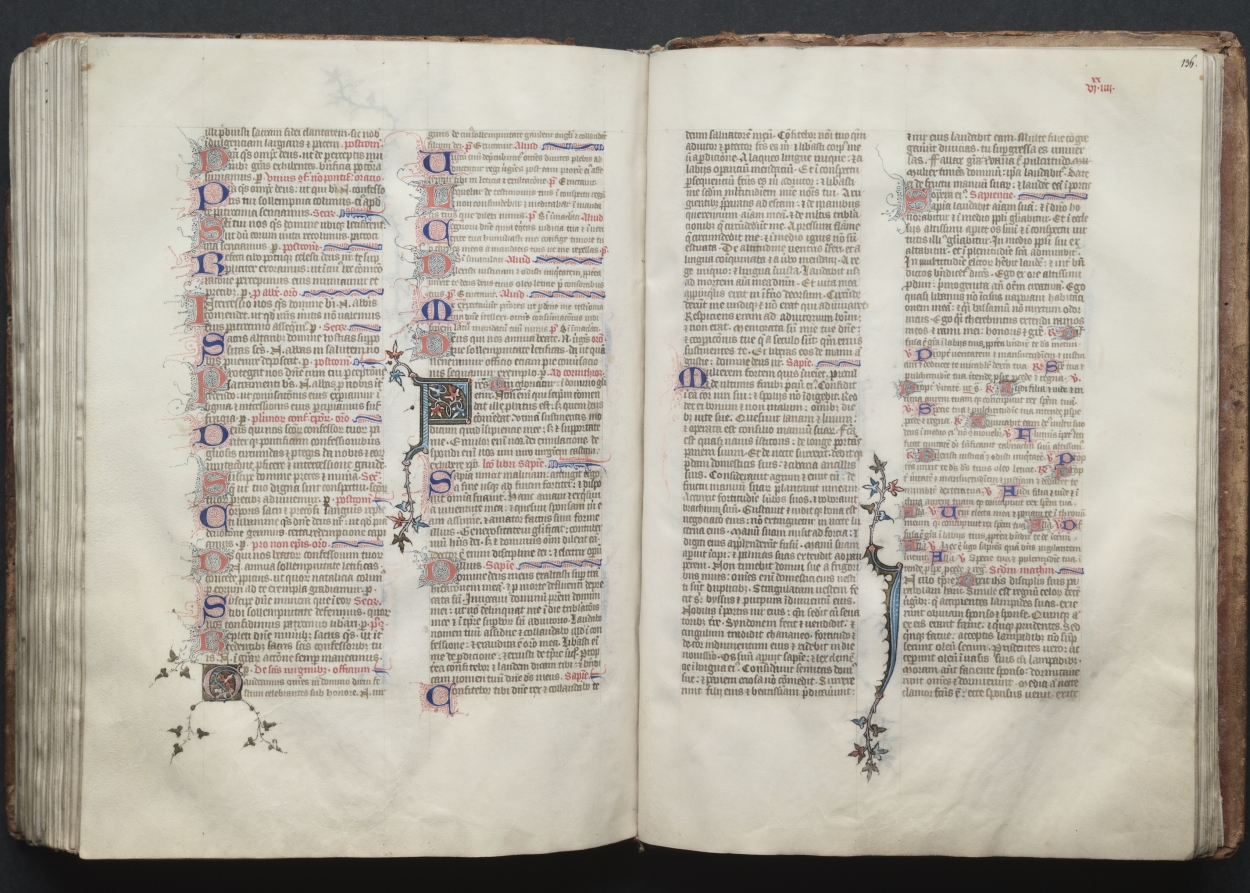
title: The Gotha Missal: Fol. 136r, Text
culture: France, Paris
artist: Master of the Boqueteaux (French)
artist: and Workshop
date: c. 1375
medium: ink, tempera, and gold on vellum; blind-tooled leather binding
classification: Bound Volume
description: The style and quality of this manuscript's decoration is typical of deluxe Parisian books made for aristocratic or royal patrons. Most of the book's decoration appears to be the work of the Master of the Boqueteaux, an artist active at the court of King Charles V (died 1380). His style was apparently shared by a number of book illuminators working in and around Paris. It is very possible that the Gotha Missal belonged to Charles V, but is not provable because the manuscript has no royal portraits and lacks a colophon. Given the book's magnificent decoration, however, it would seem that it was produced for a Valois prince, if not for the king himself. The manuscript receives its name from the German dukes of Gotha, its later owners.